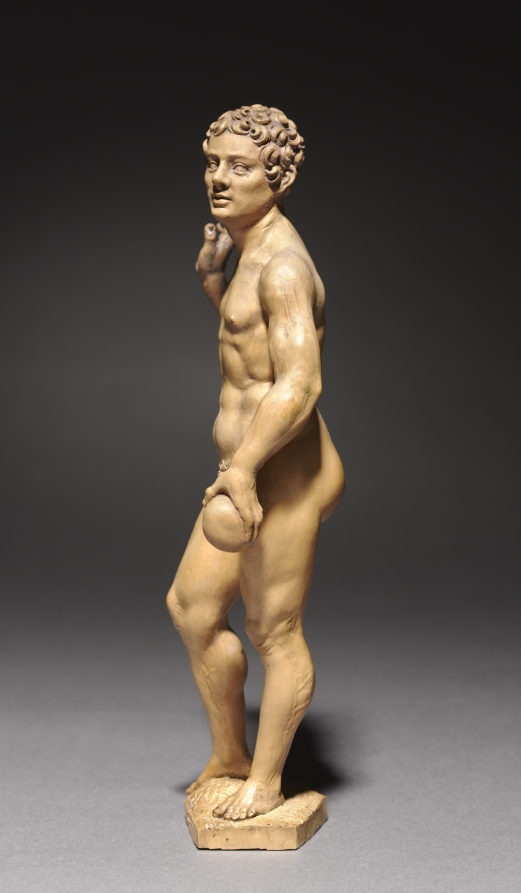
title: Adam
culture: Germany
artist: Daniel Mauch (German, 1477–1540)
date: c. 1535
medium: boxwood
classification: Sculpture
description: Mauch straddled the late medieval and Renaissance traditions in his career. These small-scale statuettes, however, each made from a single piece of boxwood, stem from the most progressive strands of Renaissance art in southern Germany, closely connected to developments in both Italian and German bronze sculpture. The bodies reveal Mauch's careful study of human anatomy as well as a rapport with Albrecht Dürer's well-known print of the same subject.